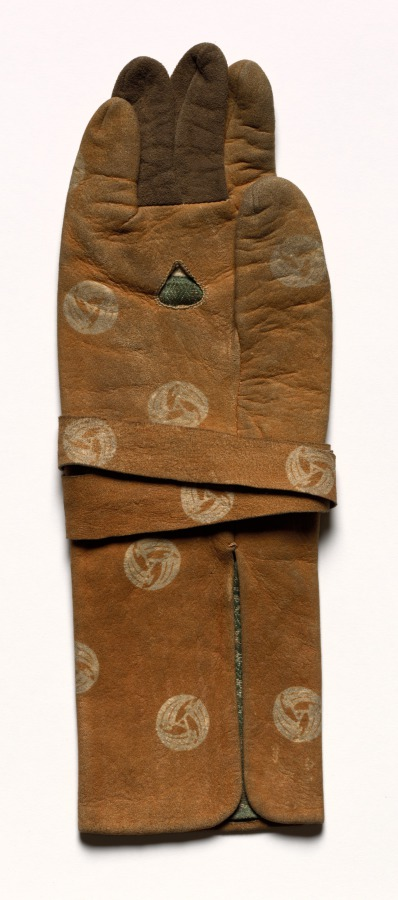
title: Archer's Glove (right)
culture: Japan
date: 1800s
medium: chamois leather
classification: Garment